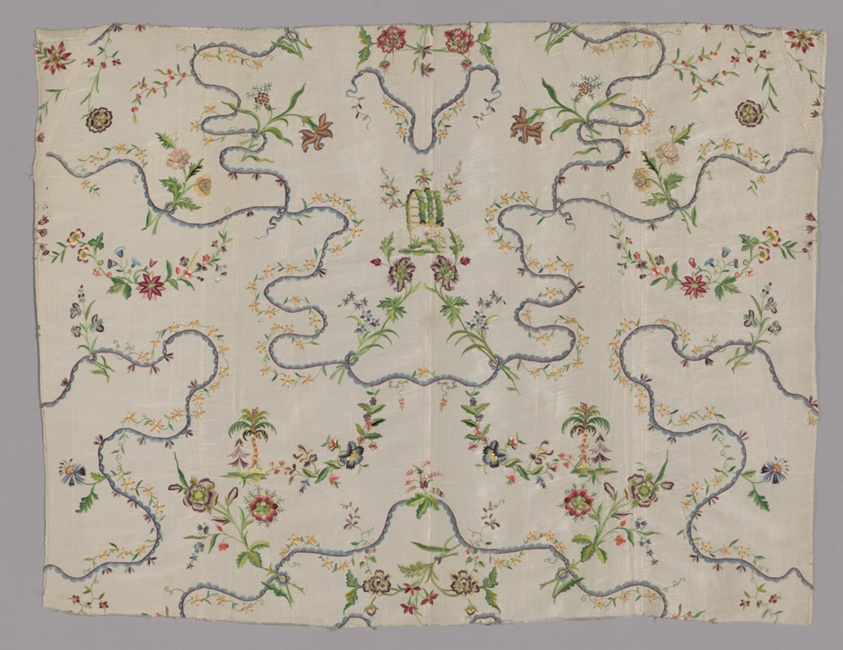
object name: Costume and Accessories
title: Petticoat Panel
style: chinoiserie, 18th Century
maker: England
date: 1730-50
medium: Silk, weft-ribbed plain weave; embroidered with silk yarns in satin, single satin, split, stem and surface satin stitches; French knots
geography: England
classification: textile; needlework (visual works); costume; costume - embroidery; skirt (garment)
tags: garden, flowers, foliage, palm branches, palm trees